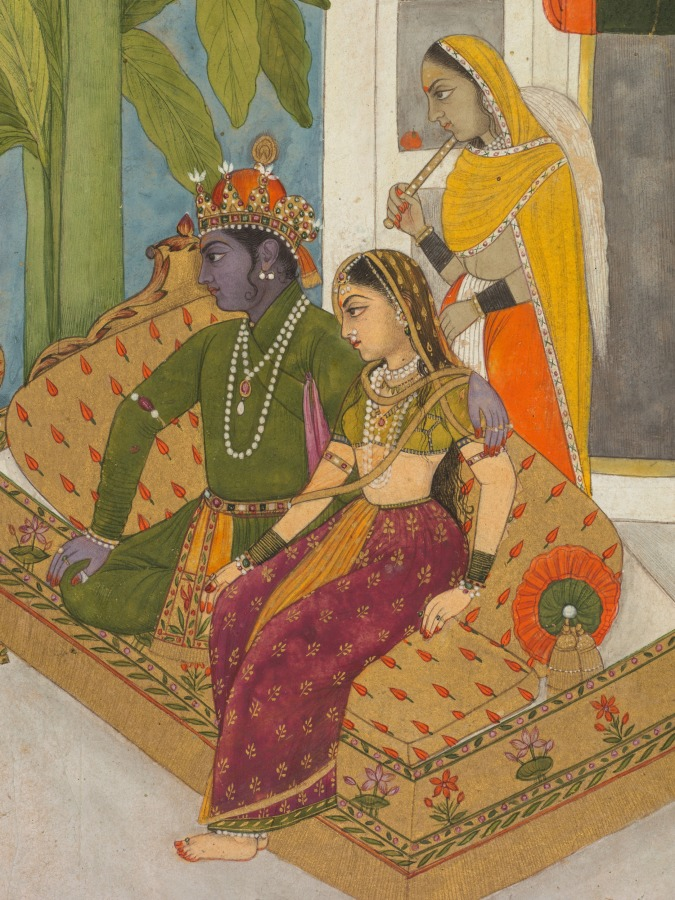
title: Shri Raga: An Illustration from a Ragamala Series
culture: India, Mughal, 18th century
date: c. 1740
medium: Gum tempera and gold on paper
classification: Painting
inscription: Inscription at top, Persian numerals: 31; Persian inscriptions on verso, in nasta‘liq script: 31 Sixth, Shri Raga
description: The verse associated with Shri Raga corresponds closely with this scene: His body, bluish in hue, is marvelously built. He is always graced with the company of auspicious Shri Lakshmi. He sits on a throne of gold, and before him Narada sits playing on his vina. He has decorated himself with garlands of flowers, and also with ornaments set with jewels. Shri raga is thus conceived in sentiment, of whom all learned men sing praises. The horse-headed figure claps his hands and accompanies the sage, wearing saffron garments and playing on the stringed instrument called a vina. He may be derived from the courtly commander of Indra, seen in the Jain manuscripts. Poppies bloom in the formal garden below the pure white terrace, and they are echoed by the oranges set on the windows of the house at the upper right.